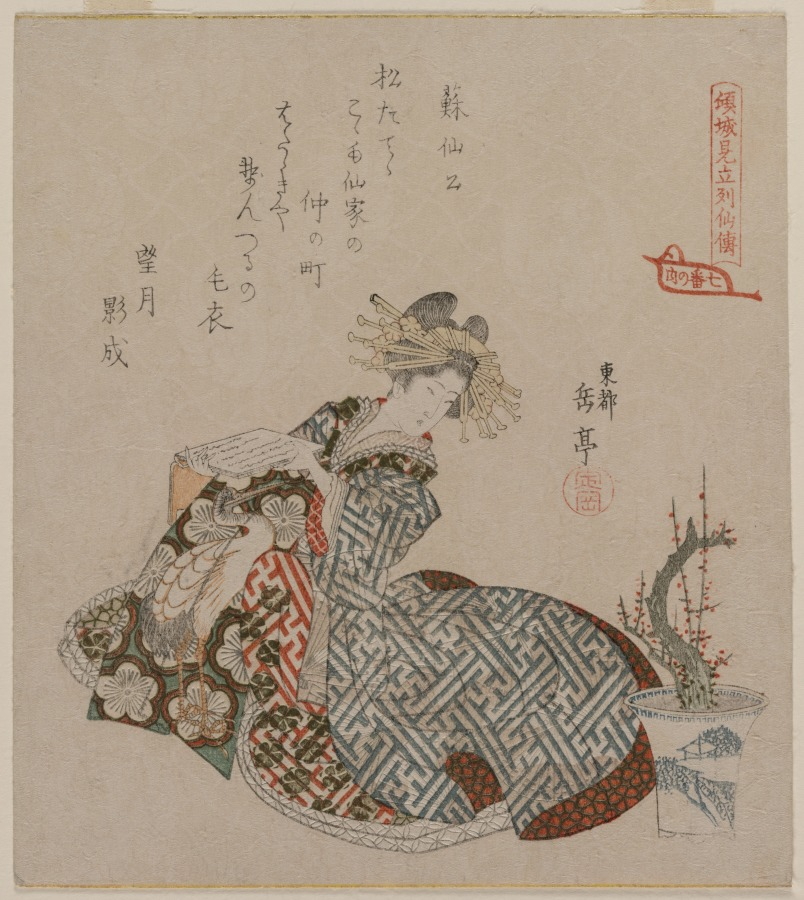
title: Courtesan Reading Beside a Potted Plum Tree, from the series Seven Courtesans Compared to Daoist Immortals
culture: Japan, Edo period (1615–1868)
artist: Gakutei Harunobu (Japanese, 1786(?)–1868)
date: early 1820s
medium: color woodblock print (surimono)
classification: Print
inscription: 東都岳亭. [印] 定岡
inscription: 傾城見立列仙傳; 七番の內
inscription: Poem by Mochizuki Kagenari 望月影成